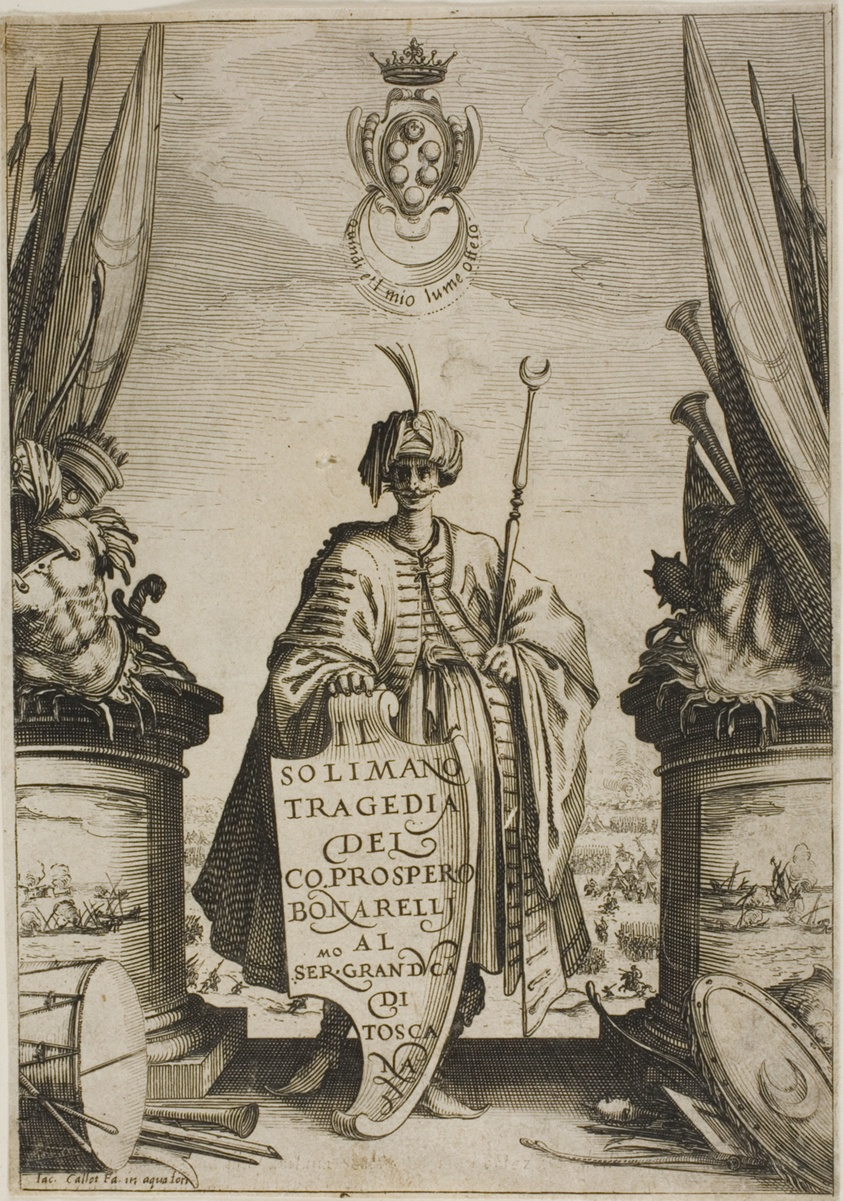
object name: Print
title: Frontispiece, from Solimano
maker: Jacques Callot (French, 1592-1635)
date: published 1620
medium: Etching and burin on paper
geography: France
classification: etching; print; prints and drawing